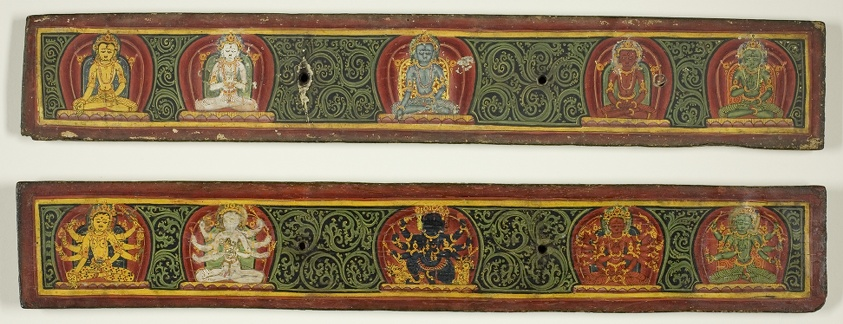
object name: Religious/Ritual Object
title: One of a Pair of Manuscript Covers from the Five Protectors (Pancharaksha)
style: Himalayan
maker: Nepal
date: 15th century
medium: Pigments and metallic paint on wood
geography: Nepal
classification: ritual objects